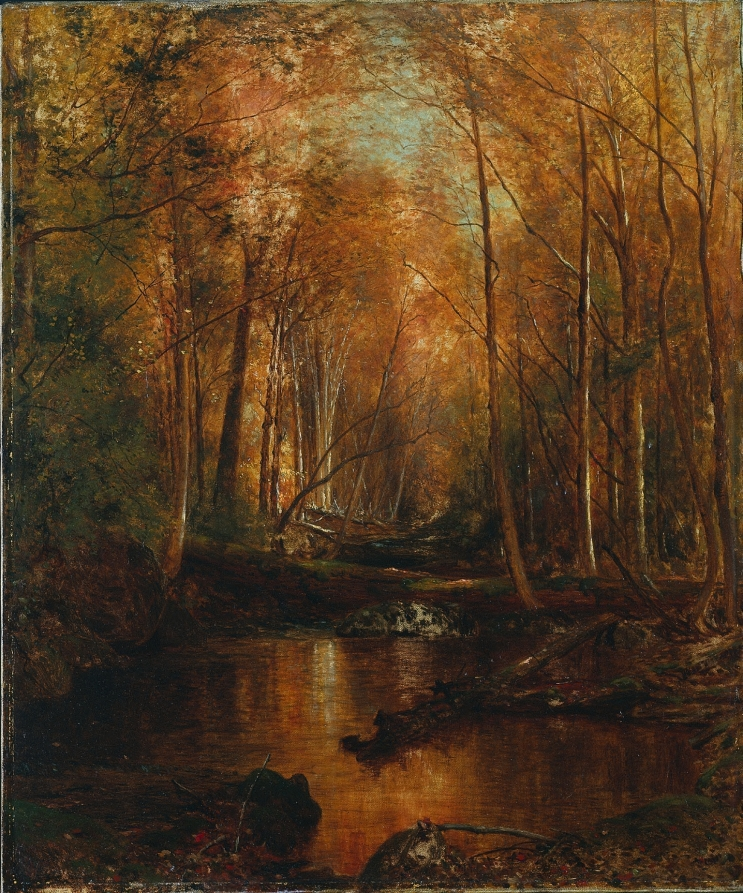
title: Autumn in the Catskills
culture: America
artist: Jervis McEntee (American, 1828–1891)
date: 1873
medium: oil on canvas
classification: Painting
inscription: Signed lower left: "JMcEntee / 1873 [J M in monogram]